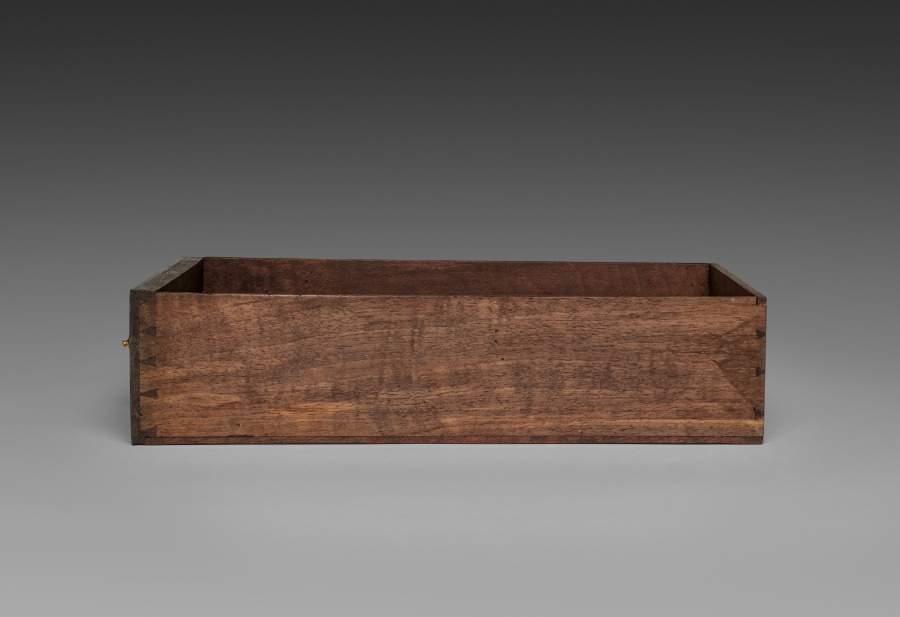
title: Interior Drawer for Cabinet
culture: France, late 17th Century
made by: André-Charles Boulle (French, 1642–1732)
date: c. 1690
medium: ebony, marquetry in metal and tortoise shell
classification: Furniture and woodwork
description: Appointed cabinetmaker to King Louis XIV in 1672, André-Charles Boulle became a master of furniture making in France during the late 1600s until his death in 1732. Known primarily for his use of marquetry, in which metal patterns are inlaid into tortoiseshell then applied within the veneered surface of the furniture, Boulle established a level of quality and craftsmanship few others could achieve. As a result, his work found favor at the royal court and among other aristocrats and diplomats eager to impress the king. The inclusion of a medallion depicting Louis XIV within the bronze decoration of this chest would have identified the owner with the royal court. Often exhibiting stout architectural proportions with elegant groups of inlaid motifs such as the parrot on the central panel of this chest, Boulle’s designs are an example of the intellectual fashion for contrasting ideas, materials, and motifs.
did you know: Originally designed to sit atop an elaborate tall stand, this chest was likely altered in the late 1700s to reduce its scale and height.